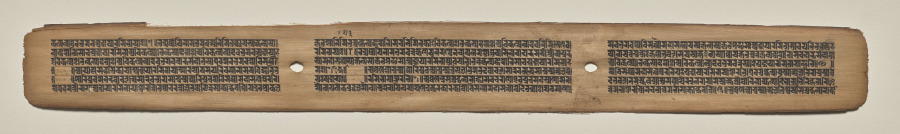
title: Text, folio 156 (recto), from a Manuscript of the Perfection of Wisdom in Eight Thousand Lines (Ashtasahasrika Prajnaparamita-sutra)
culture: Eastern India, Bihar, Vikramashila Monastery. Painting: Nepal, Kathmandu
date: Sunday, September 14, 1119 (year 239 of the Newar Samvat in the month of Ashvina)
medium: gum tempera and ink on palm leaves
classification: Painting